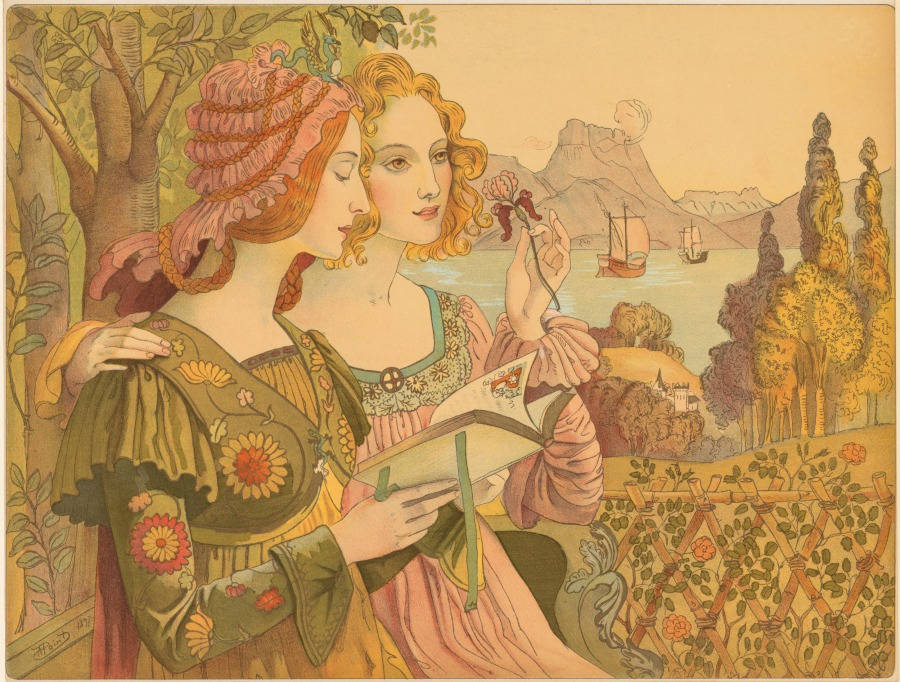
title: The Golden Legend (Legende Dorée)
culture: France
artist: Armand Point (French, 1861–1932)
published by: F. Champenois, Paris.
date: 1897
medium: color lithograph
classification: Print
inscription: Blindstamp lower right in margin. Signed in the stone lower left.